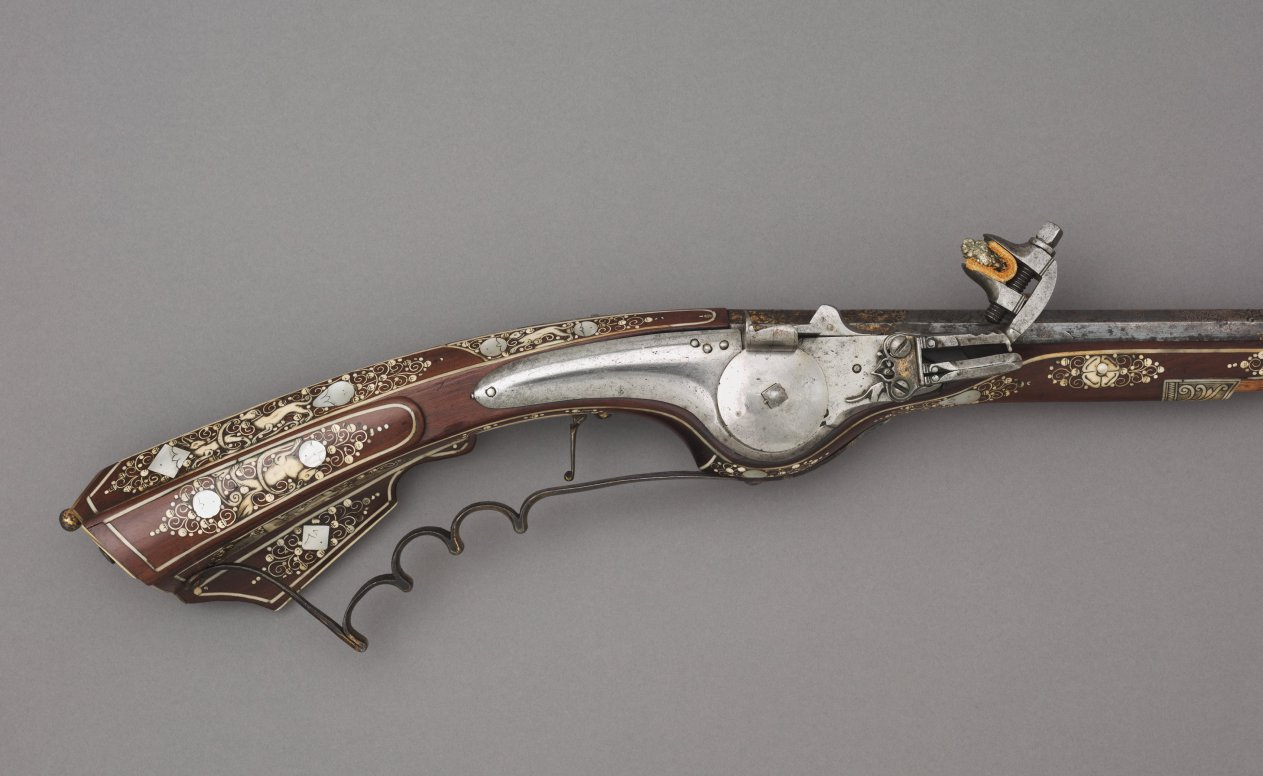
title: Wheel-lock Petronel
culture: Silesia (Southwestern Poland), Teschen, 17th century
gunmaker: Georg Kurland (Polish)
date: c. 1630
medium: steel, gilding, and wood inlaid with elk horn, ivory, and mother-of-pearl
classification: Arms and Armor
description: A petronel was a type of long pistol made with a wheel-lock ignition. Despite its length, the petronel was fired at the wrist like a pistol and not at the shoulder like a rifle. They were generally made in pairs during the early 1600s. Civilian versions were elaborately decorated for aristocratic clients.